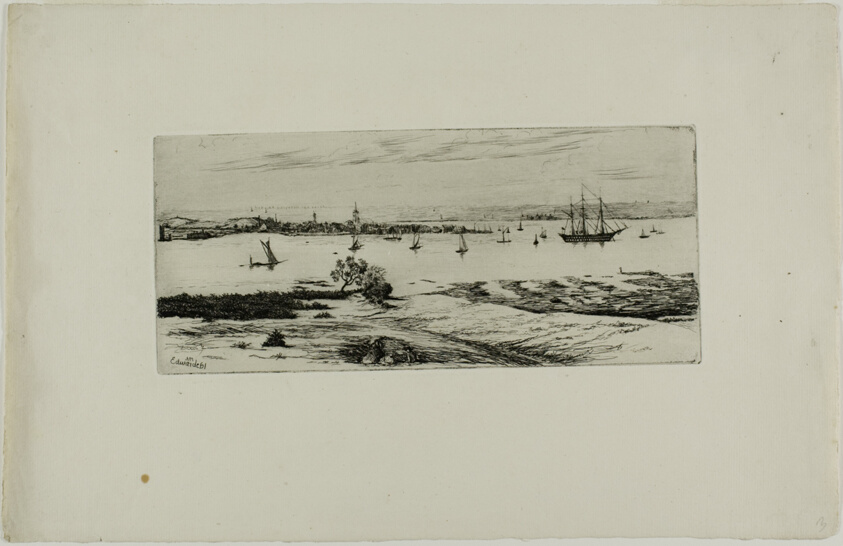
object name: Print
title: Boats in a Harbor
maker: Edwin Edwards (English, 1823-1879)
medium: Etching on ivory wove paper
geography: England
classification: etching; print; prints and drawing